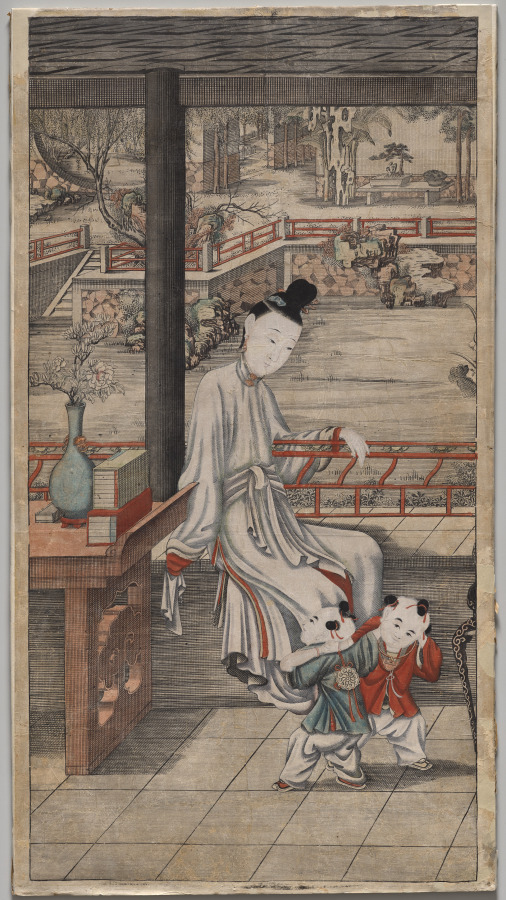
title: Gusu Beauties of the Four Seasons – Spring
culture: China, Qing dynasty (1644–1911), Qianlong period (1736–95)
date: 1736–95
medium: Polychrome woodblock print; ink and color on paper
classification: Print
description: In the 1600s, printing flourished in such Jiangnan cities as Nanjing, Suzhou, Hangzhou, and Huizhou, evolving from privately enjoyed illustrated books printed in color to more commercialized single-sheet color prints that were hung on walls and became part of the rich urban visual culture.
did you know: Woodblock printing in color reached a height in China in the 1600s to 1700s. The prints were executed by means of sets of separate blocks, each carved to print a different color.